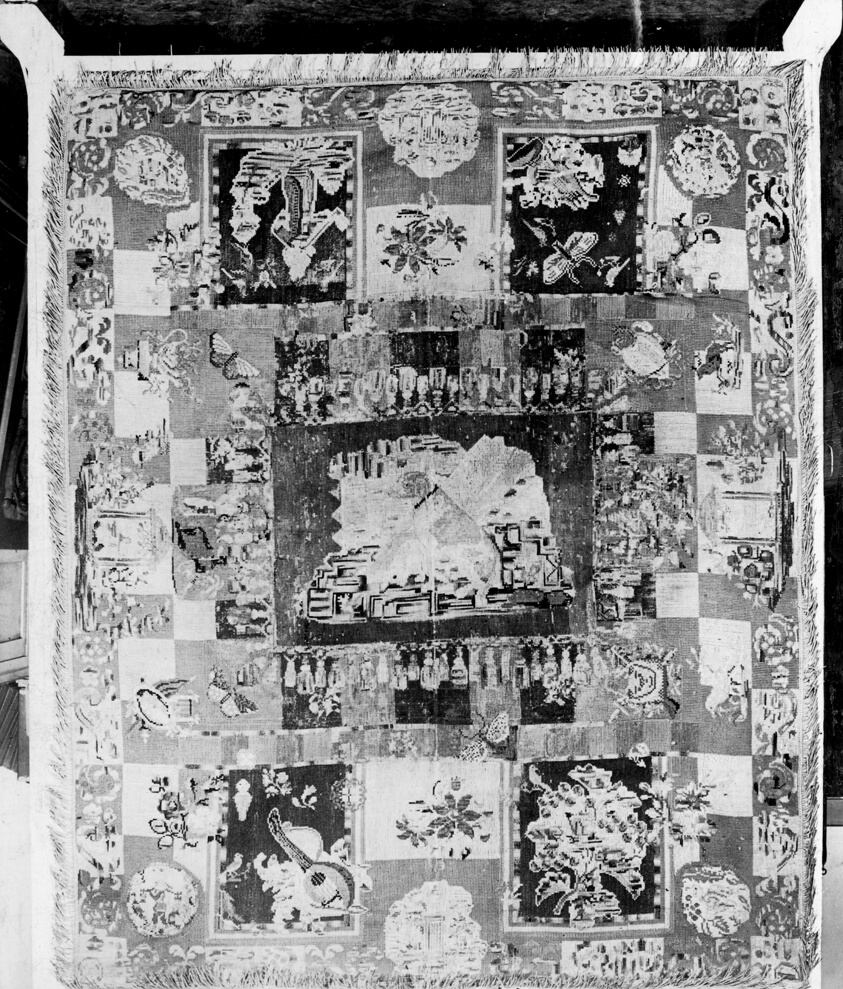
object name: Textile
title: Rug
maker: England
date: 1850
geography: England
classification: textile; needlework - rug; weaving - rug; rug